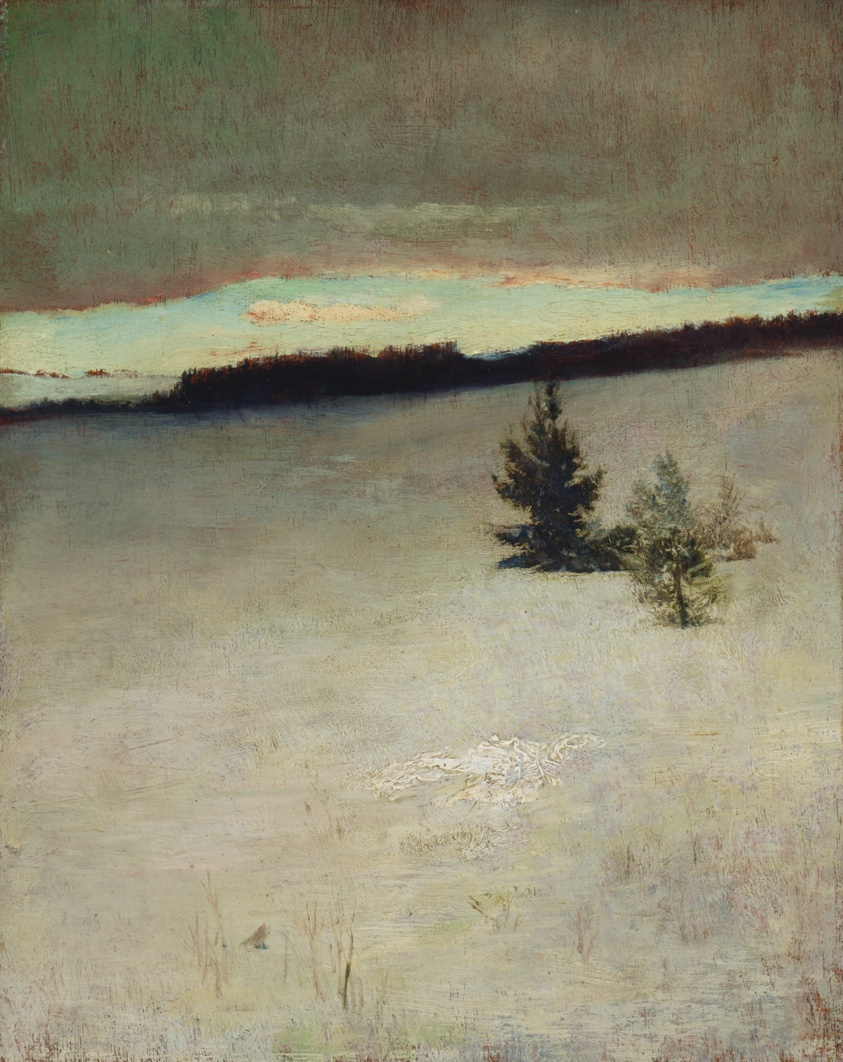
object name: Painting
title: Snow Field, Morning, Roxbury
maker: John La Farge (American, 1835–1910)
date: 1864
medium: Oil on beveled mahogany panel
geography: Roxbury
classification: painting; american arts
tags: landscapes, winter